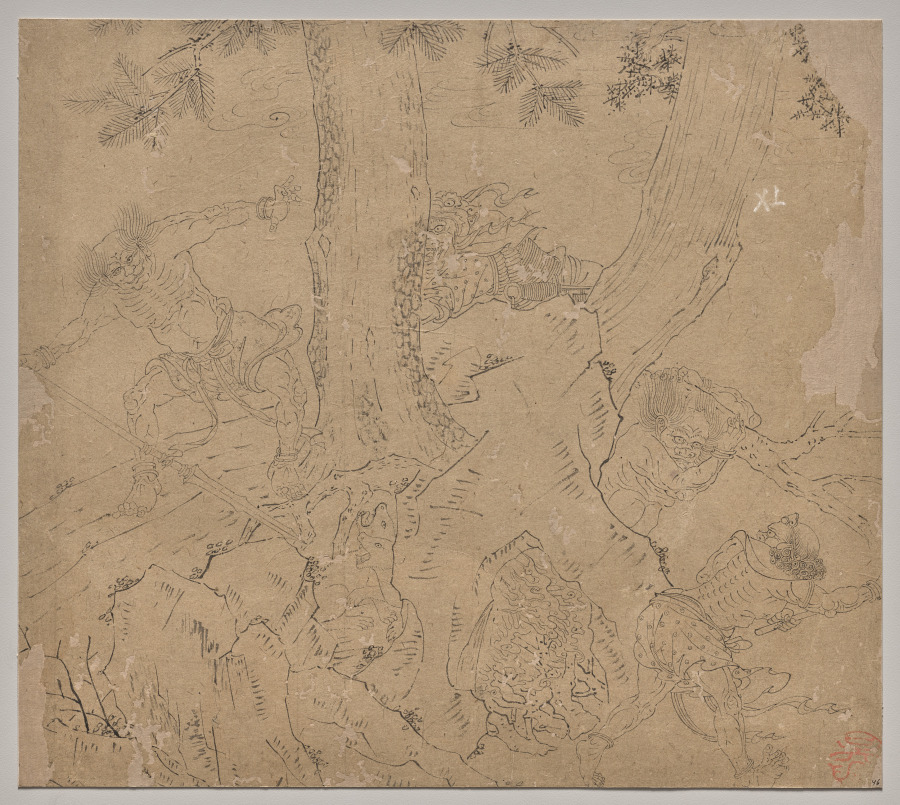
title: Album of Daoist and Buddhist Themes: Search the Mountain: Leaf 46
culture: China, Southern Song dynasty (1127-1279)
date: 1200s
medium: Album, ink on paper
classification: Painting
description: Part of the series “Clearing the Mountains” (soushan tu), this leaf depicts a soldier who uses his spear to probe a hollow in which two wolves are hiding. To the right of the pine trees at the center are three soldiers, two of whom are searching for their targets, and one carrying an enormous log.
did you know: Two soldiers create a fire to drive the wolves out.